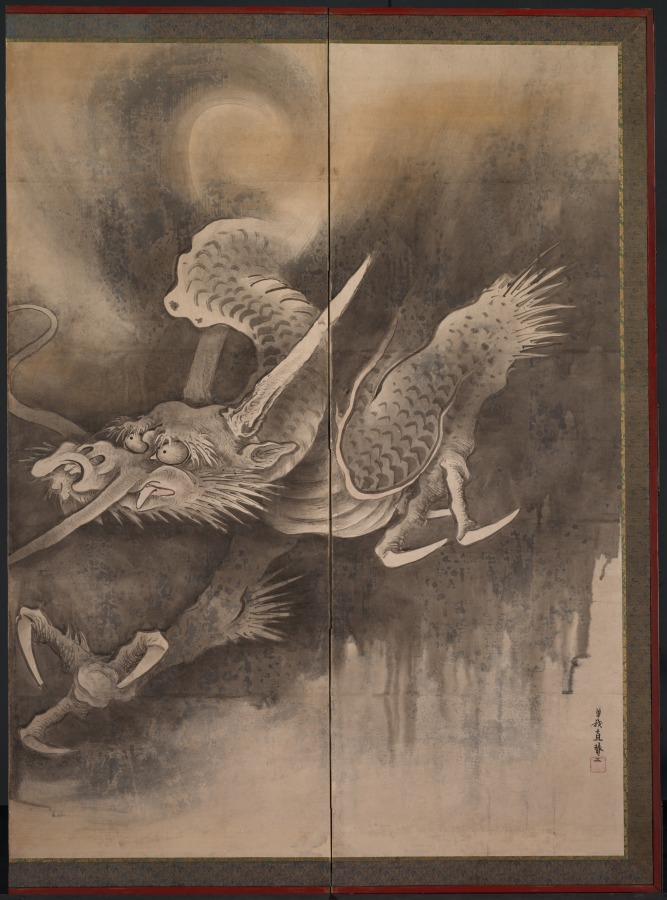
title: Dragon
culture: Japan, Edo period (1615–1868)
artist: attributed to Soga Nichokuan (Japanese)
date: early to mid-1600s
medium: six-panel folding screen; ink, slight color, gold, and silver on paper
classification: Painting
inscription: Signed: Soga Chokuan II (Soga Chokuan ni). Sealed: Hoin (right), Soga Chokuan Hoin (three seals at left) Edo period (1615-1868)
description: A dragon dives through clouds on this screen, while on the other screen, a tiger looks upon a waterfall as it prowls out of a bamboo grove. Tiger and dragon are traditional symbols of the balancing forces in the world, yin (the feminine aspect) and yang (the masculine aspect). This painting has a signature and seals, identifying it as a work by Soga Nichokuan, a painter thought to be from Sakai (near Osaka), and known primarily for his representations of hawk-eagles (kumataka).